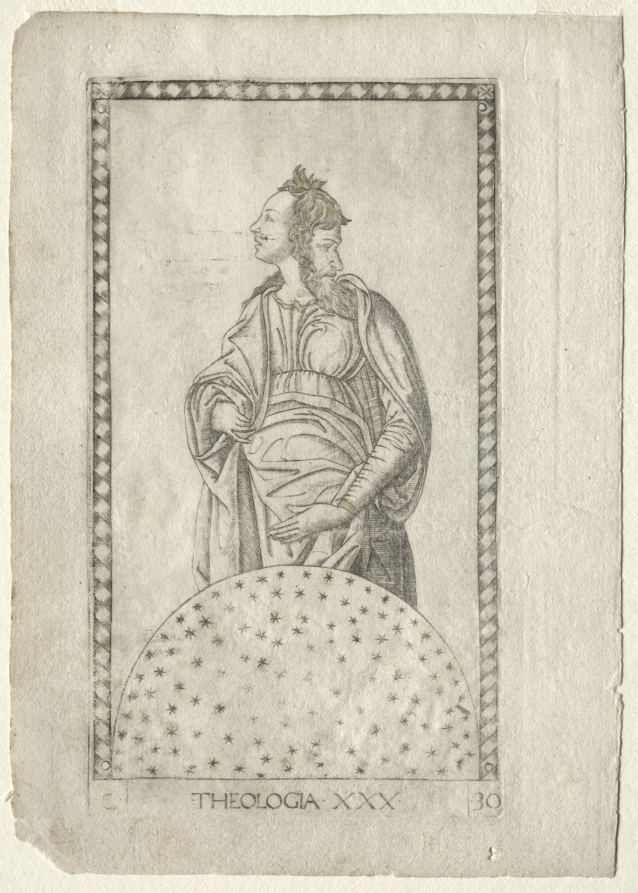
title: Theology (from the Tarocchi, series C: Liberal Arts, #30)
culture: Italy, Ferrara, 15th century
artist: Master of the E-Series Tarocchi (Italian, active 1460s)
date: before 1467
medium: engraving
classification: Print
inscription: Lettered below the image of Theologia (Theology): ·C· / ·THEOLOGIA·XXX· / ·30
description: This engraving is part of the group “C” named Liberal Arts. Conceptually, the liberal arts descended from classical antiquity, and were divided into the Trivium (Grammar, Rhetoric, and Dialectic or Logic) and the Quadrivium (Music, Geometry, Arithmetic, and Astronomy). In the Tarocchi set the total number was risen to ten, with the addition of the three disciplines (Poetry, Philosophy, and Theology). The liberal arts denoted knowledge or skills considered necessary to participate in a free society. By the late Middle Ages, they began to be represented in the visual arts as womanlike allegories. Here, Theologia (Theology) is personified as a half-length pregnant female figure in profile. A bearded visage of an old man is placed on the back of the graceful woman’s head. These two profiles embody the ability to observe the heavens and to look at the earth, respectively. Theology is set on her attribute—a starry sphere—which epitomizes the study of celestial things.